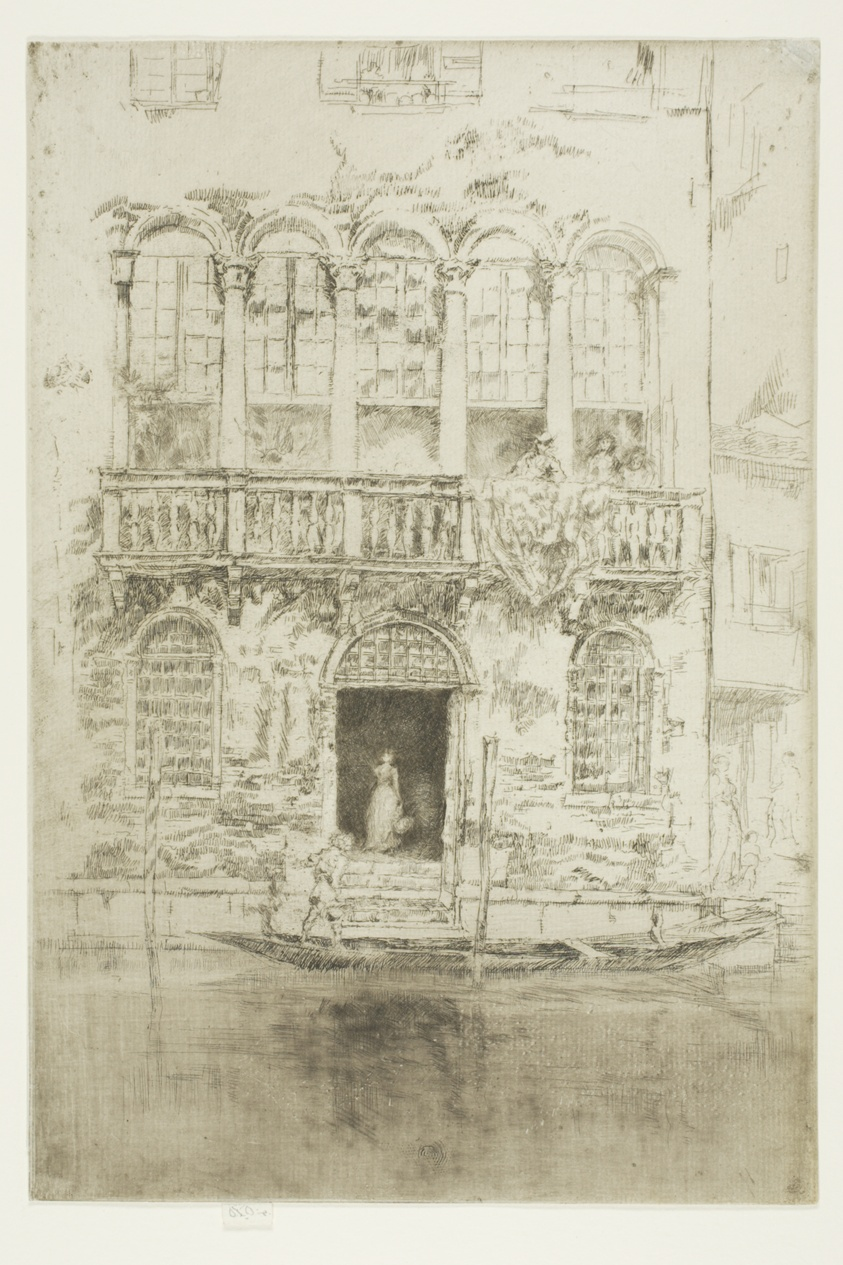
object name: Print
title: The Balcony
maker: James McNeill Whistler (American, 1834-1903)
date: 1879/80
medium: Etching and drypoint with foul biting in dark brown ink on ivory laid paper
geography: United States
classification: etching; foul biting; print; prints and drawing; drypoint; paper